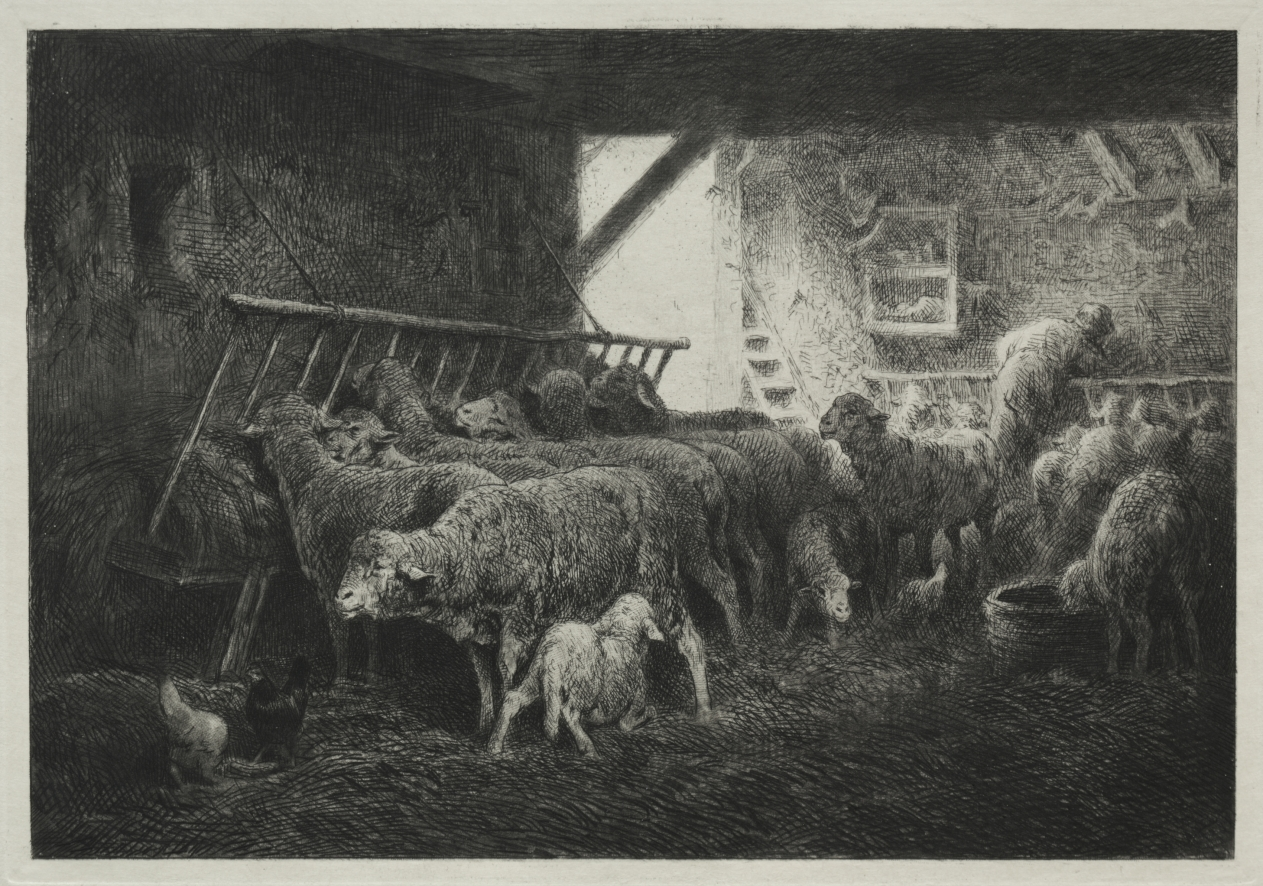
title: Interior of a Sheep Pen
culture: France, 19th century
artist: Charles-Émile Jacque (French, 1813–1894)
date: c. 1878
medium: drypoint and roulette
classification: Print